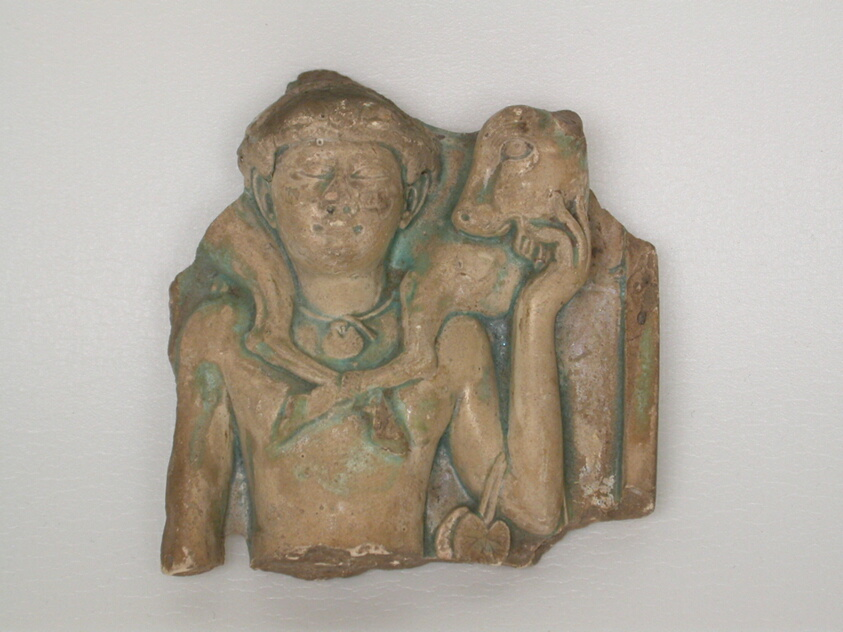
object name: Sculpture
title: Relief Depicting a Calf-Bearer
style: egyptian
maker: Egyptian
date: Ptolemaic Period (304-30 BCE)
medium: Glazed stone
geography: Egypt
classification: sculpture; ancient art